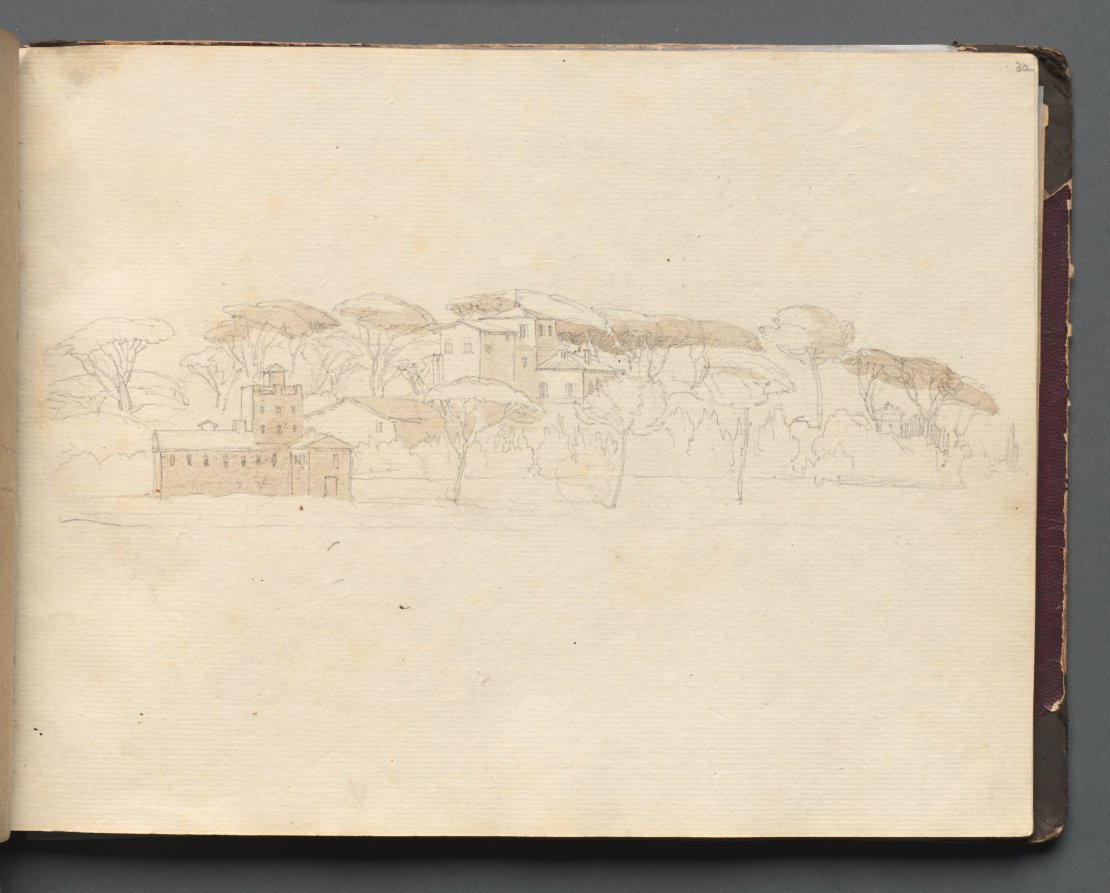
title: Album with Views of Rome and Surroundings, Landscape Studies, page 30a: Roman Panoramic View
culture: Germany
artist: Franz Johann Heinrich Nadorp (German, 1794–1876)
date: c. 1830s-70s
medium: graphite with brown wash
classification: Bound Volume